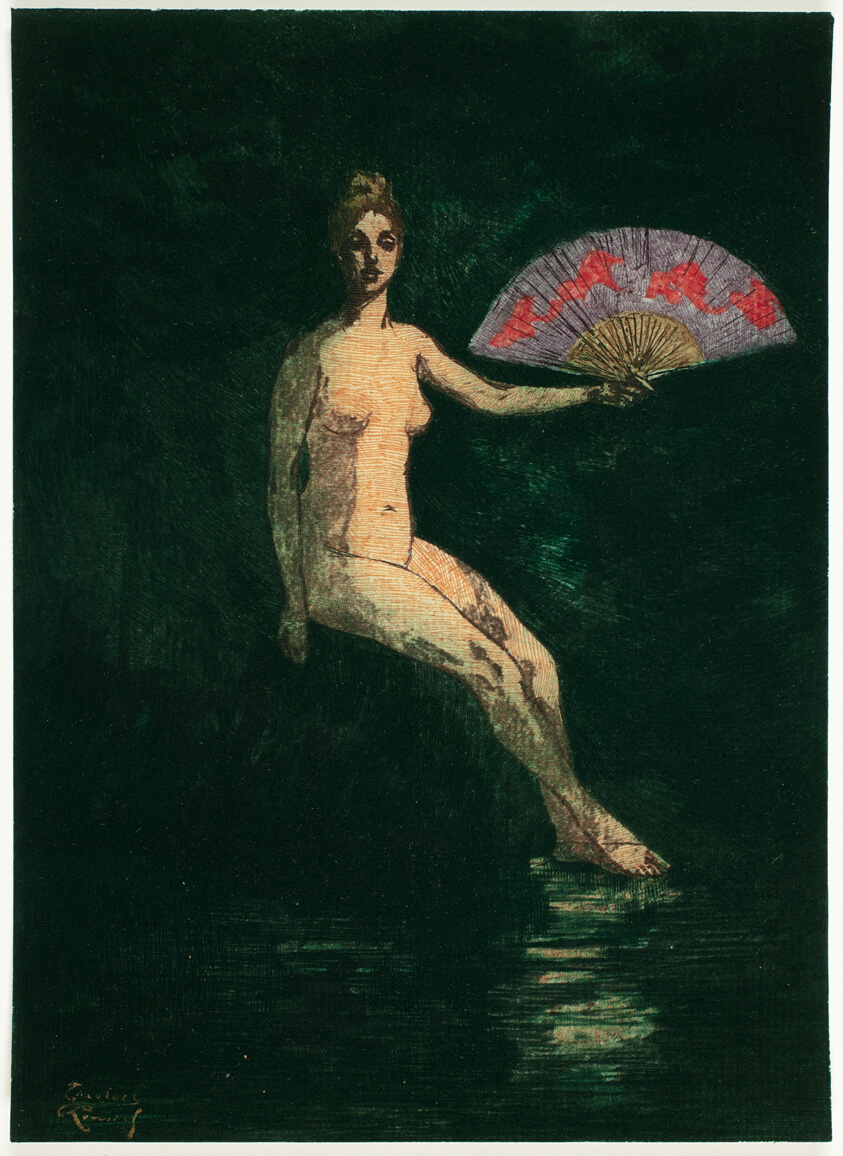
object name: Print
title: Summer (Color Version)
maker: Theodore Roussel (French, worked in England, 1847-1926)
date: 1890–1900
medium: Color etching, aquatint, and lavis on ivory laid paper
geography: England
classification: etching; aquatint; paper; print; prints and drawing